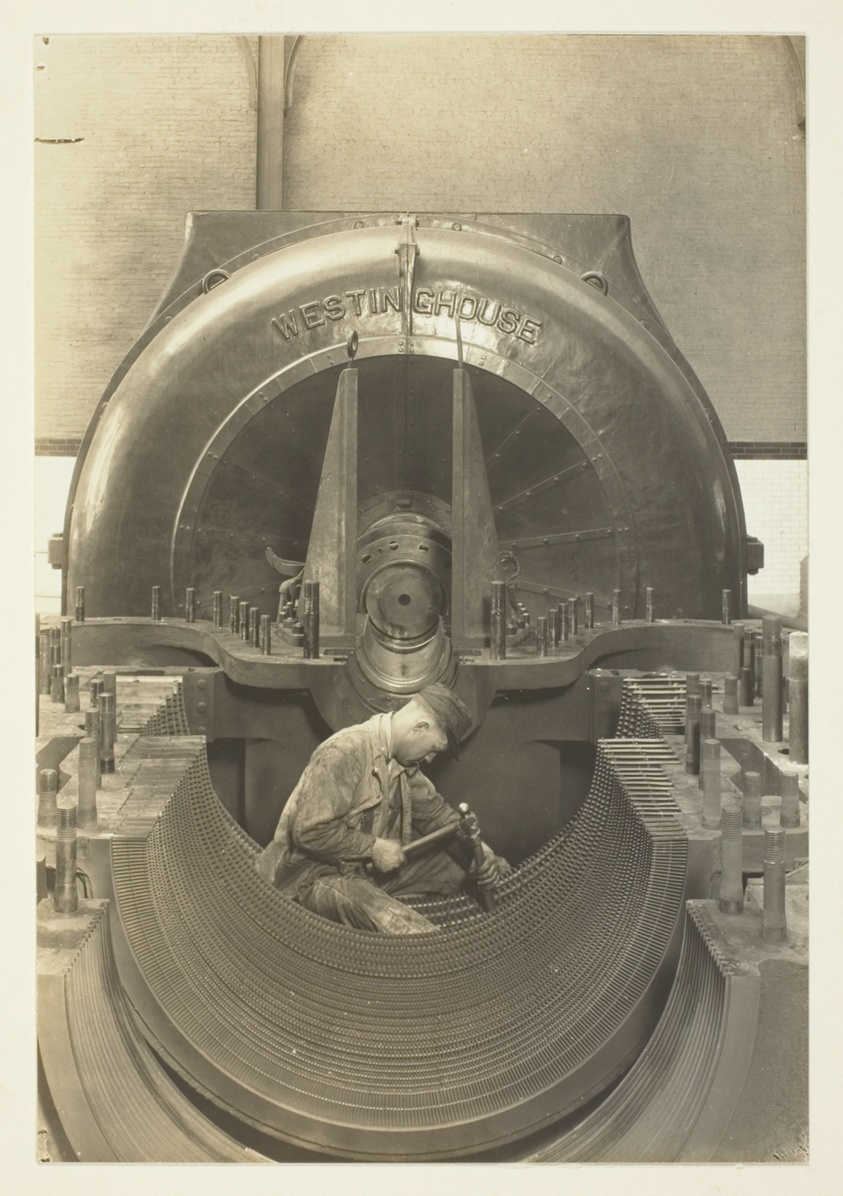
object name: Photograph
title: The Turbine, Power-House, New York City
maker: Lewis Wickes Hine (American, 1874–1940)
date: 1920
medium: Gelatin silver print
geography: United States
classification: gelatin silver (developing-out-paper) pr; photographic process; photography; photograph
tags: Collected by Hugh Edwards